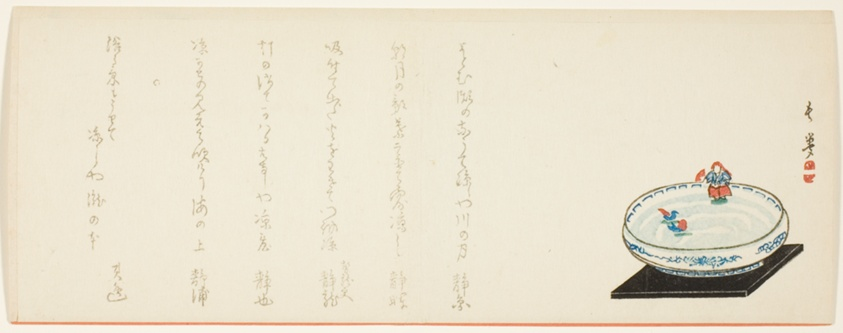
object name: Print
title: Floating Shojo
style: Japanese (culture or style)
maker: Chomu (Japanese, active 19th century)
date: 1870s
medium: Color woodblock print; surimono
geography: Japan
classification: woodblock print; print; asian art